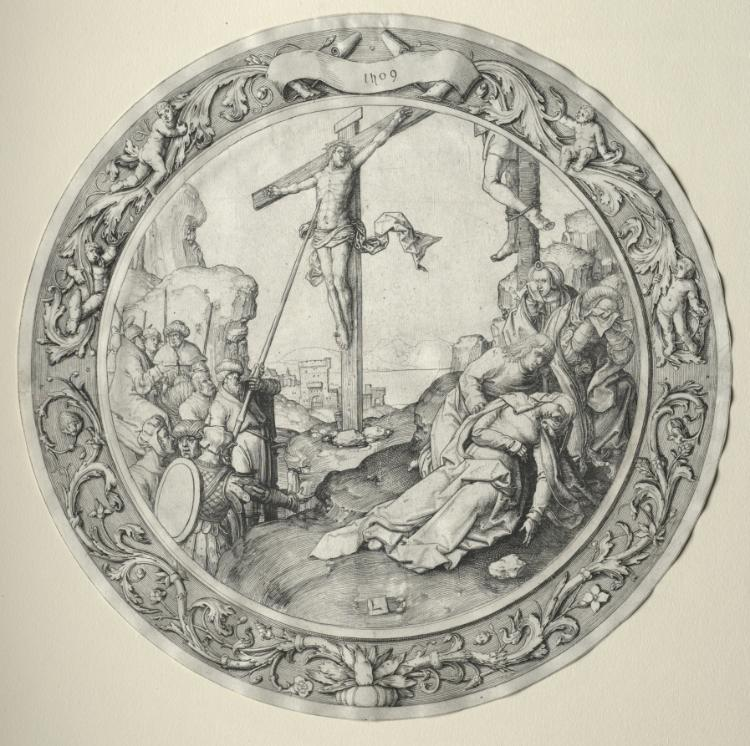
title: The Round Passion: The Crucifixion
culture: Netherlands, 16th century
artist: Lucas van Leyden (Netherlandish, 1494–about 1533)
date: 1509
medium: engraving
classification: Print